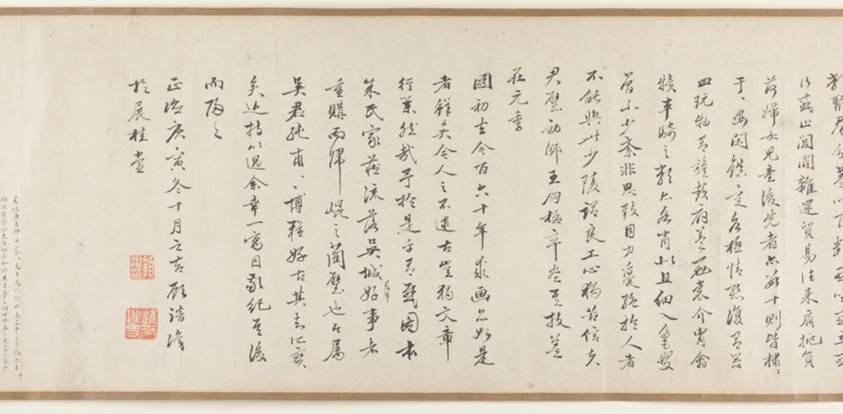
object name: Painting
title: Street Scenes in Times of Peace 太平風會圖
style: Chinese (culture or style)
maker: Zhu Yu (Zhu Junbi) 朱玉（朱君璧）; Chinese, 1293-1365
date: Yuan dynasty (1279–1368), 14th century 元朝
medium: Handscroll; ink and colors on paper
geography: China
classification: handscroll; painting; asian art